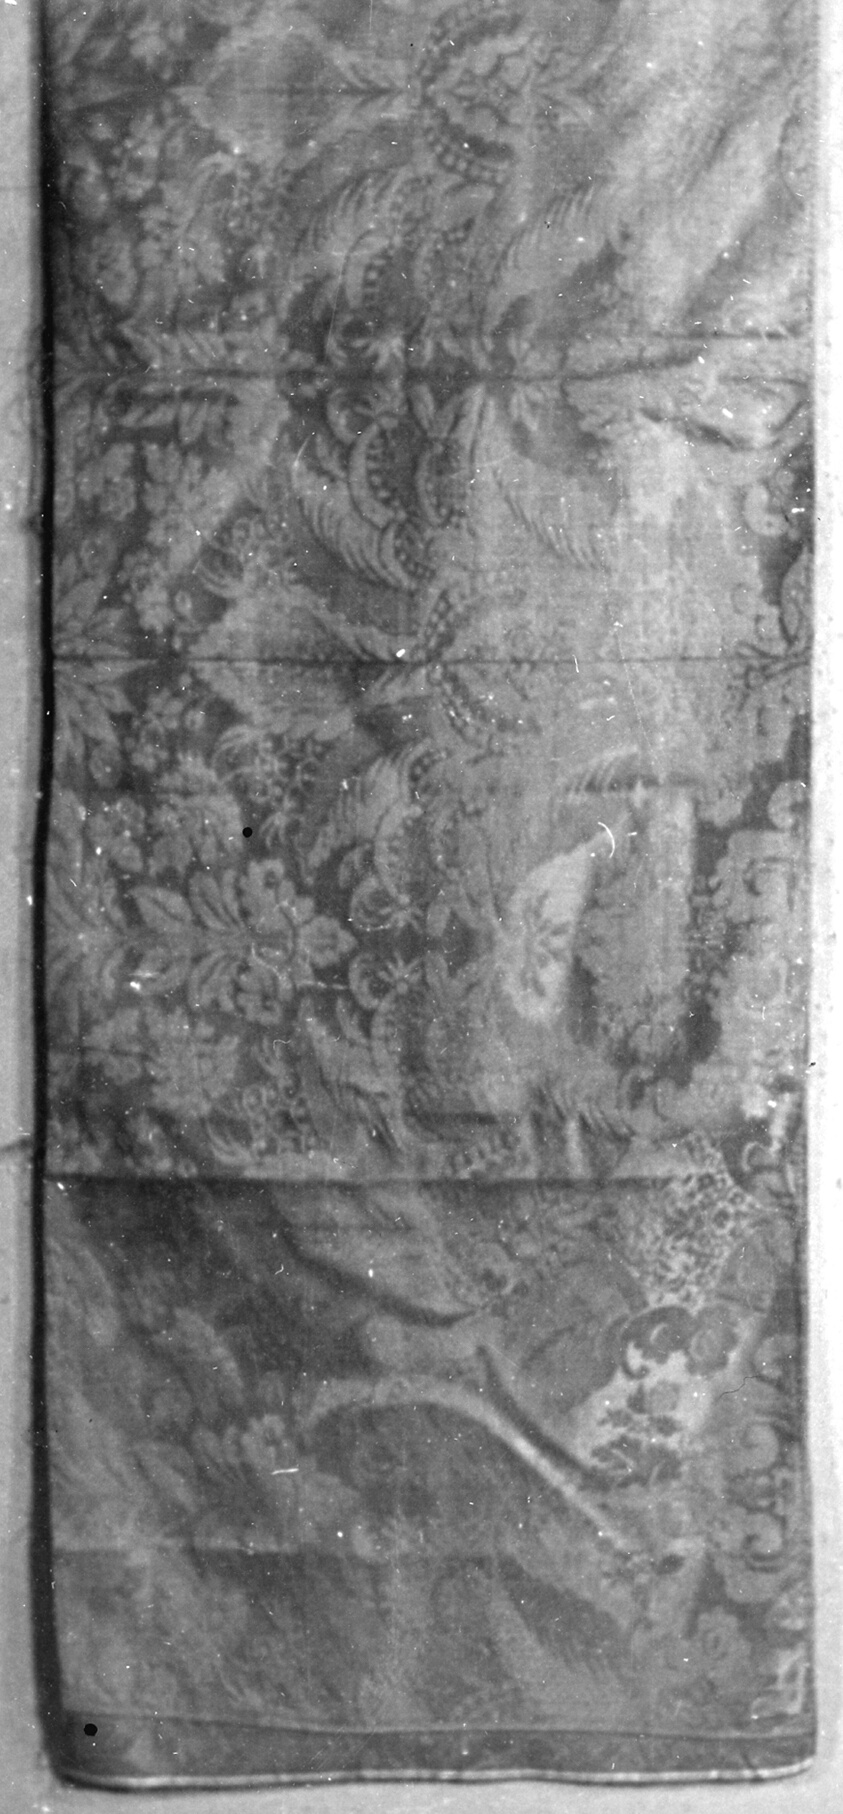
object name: Textile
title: Panel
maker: France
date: c. 1700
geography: France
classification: textile; weaving